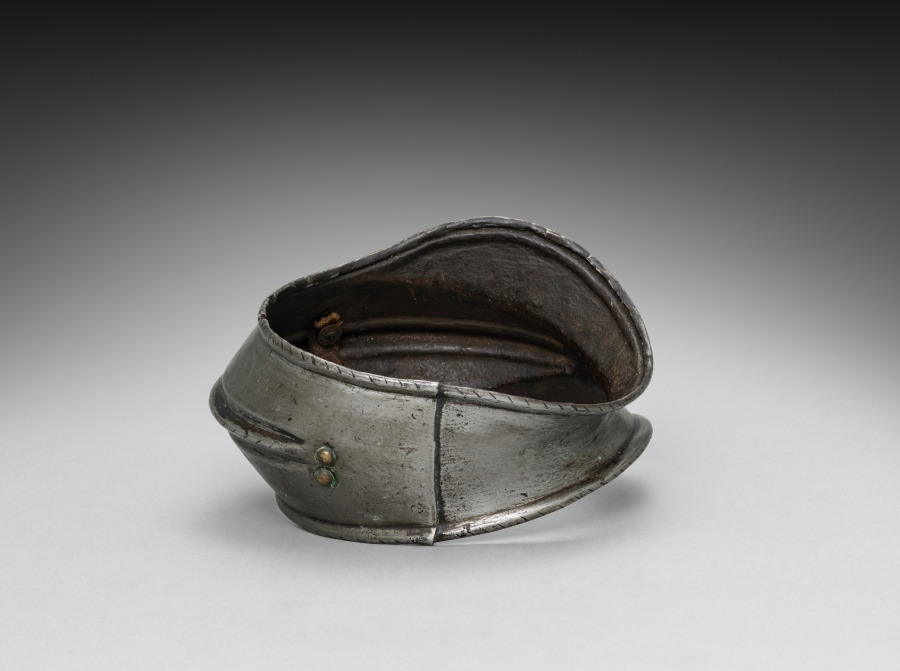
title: Knee Cap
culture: Germany, 19th century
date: 1801–1900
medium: steel with black paint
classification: Arms and Armor